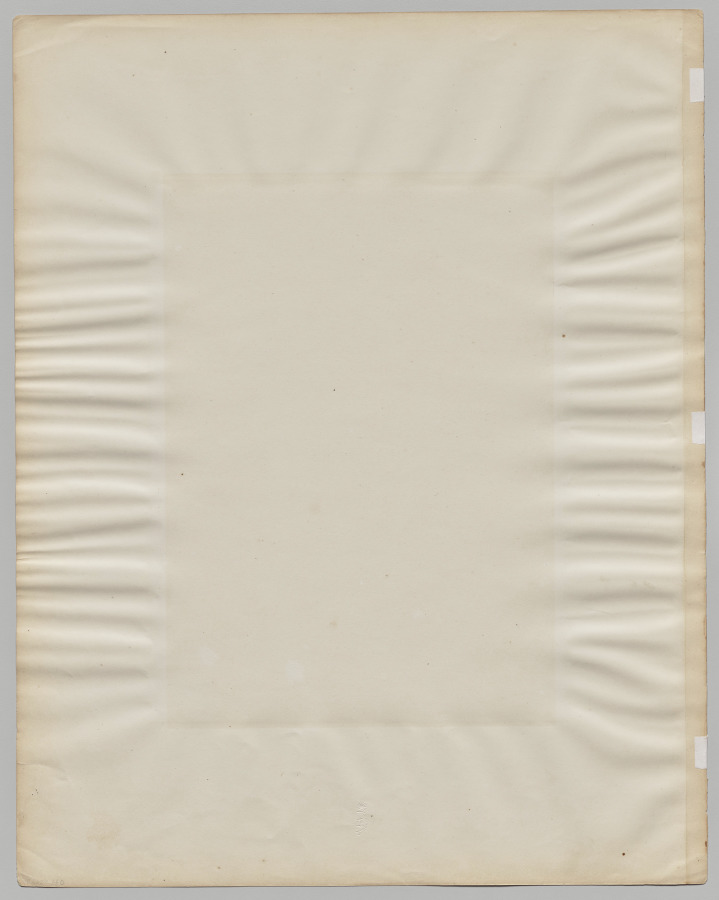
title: Pudhu Mandapa of Tirumal Nayak (r. 1623–59), Minakshi Sundareshvara Temple, Madurai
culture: England, 19th century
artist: Captain Linnaeus Tripe (British, 1822–1902)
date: 1858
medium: albumen print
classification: Photograph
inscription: Imprinted in black type on white paper adhered to recto of mount: "4"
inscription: Embossed on recto of mount: "LT/Photographer to Government"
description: The temple complex that contains this open, pillared hall is dedicated to Minakshi, a form of Parvati, and her consort, Sundareshvara, a form of Shiva. The central column depicts Shiva feeding sugarcane to an elephant. Because Linnaeus Tripe respected the Hindu temples as places of religious, historical, and artistic value, he strove to document the carvings decorating the temples, even when they were hidden in shadow.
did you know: This hall was built to serve as a summer house for the gods to whom the temple is dedicated.